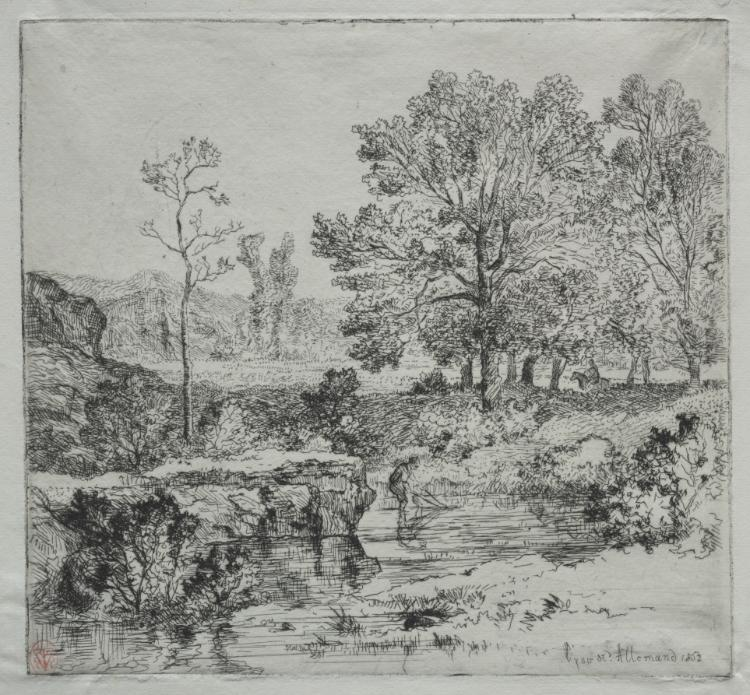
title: The Edge of the Forest. The Shrimp Fisherman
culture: France, 19th century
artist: Louis Hector François Allemand (French, 1809–1886)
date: 1852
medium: etching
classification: Print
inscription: lower right, in plate: Lyon H. Allemand 1852